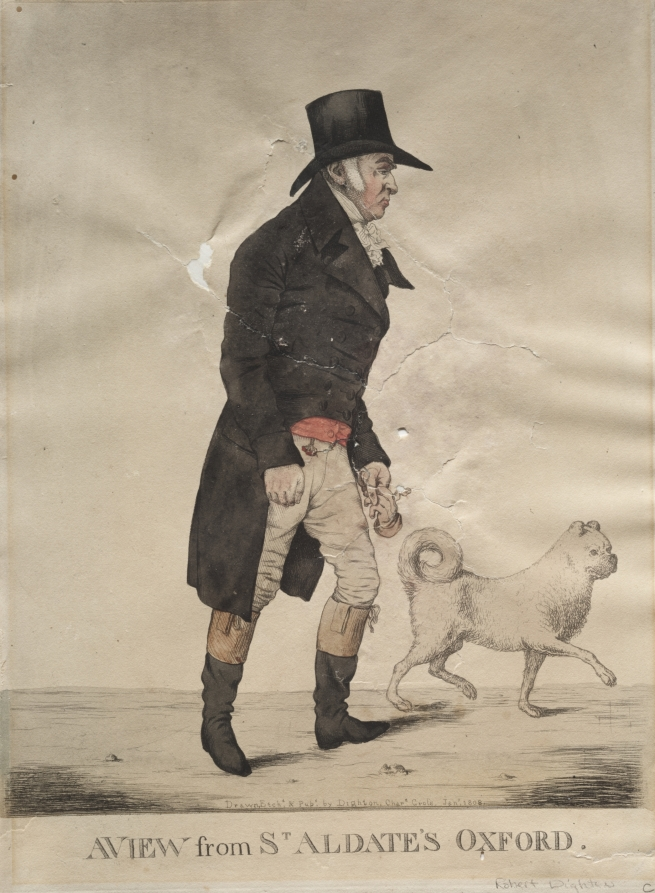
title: A View from St. Aldate's, Oxford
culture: England, 19th century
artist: Richard Dighton (British, 1795–1880)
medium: etching, hand colored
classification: Print